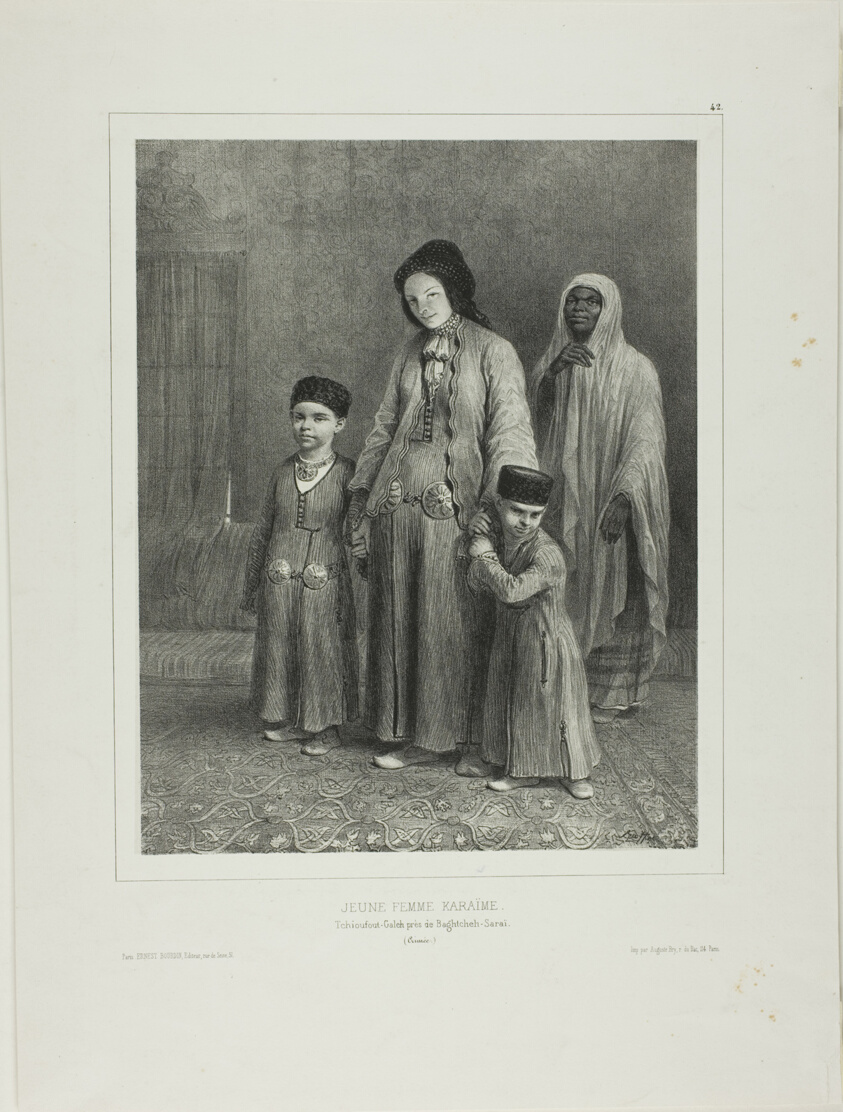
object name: Print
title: Young Karaïme Woman, Tchioufout-Galech Near Baghtcheh-Saraï, Crimea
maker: Denis Auguste Marie Raffet (French, 1804-1860); printed by Auguste Bry (French, 19th century); published by Éditeur Ernest Bourdin (French, active 19th century)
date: 1840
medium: Lithograph in black on ivory chine laid down on ivory wove paper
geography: France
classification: lithograph; print; prints and drawing